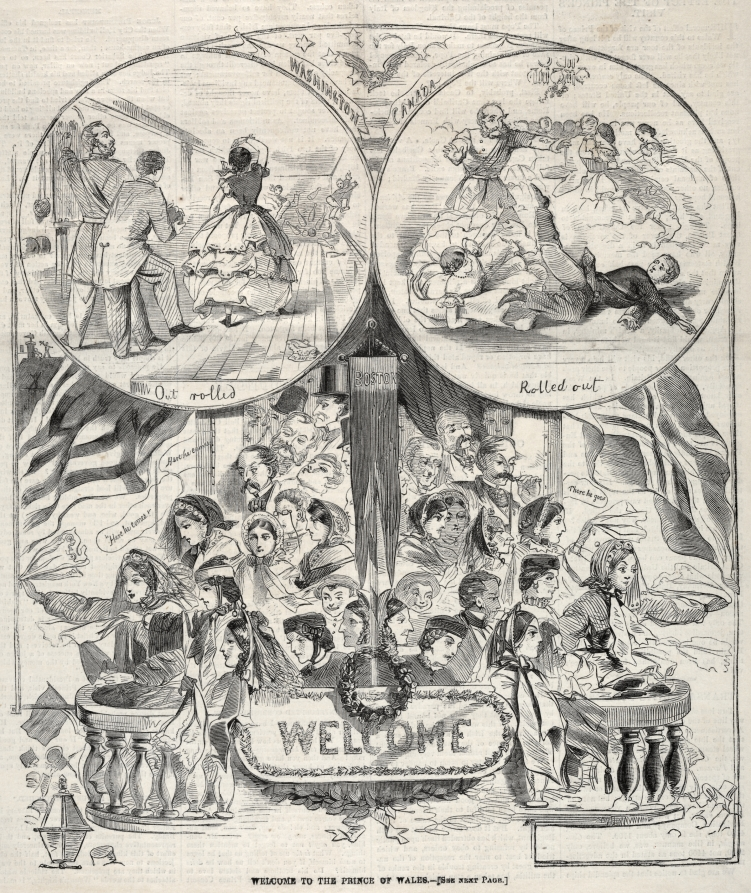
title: Welcome to the Prince of Wales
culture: America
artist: Winslow Homer (American, 1836–1910)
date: 1860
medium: wood engraving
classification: Print